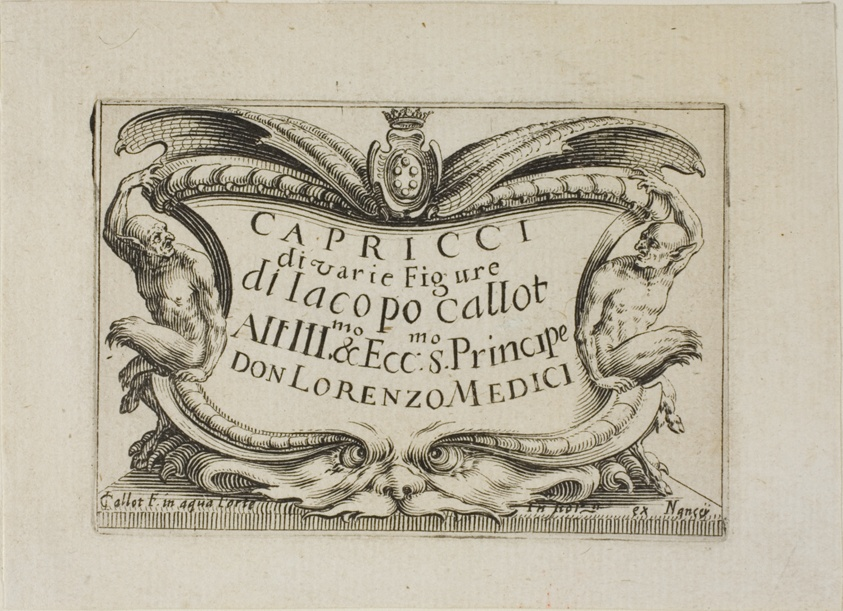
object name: Print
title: Frontispiece, from Capricci di varie figure (The Caprices) - The Nancy Set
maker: Jacques Callot (French, 1592-1635)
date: c. 1622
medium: Etching on ivory laid paper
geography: France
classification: etching; print; prints and drawing